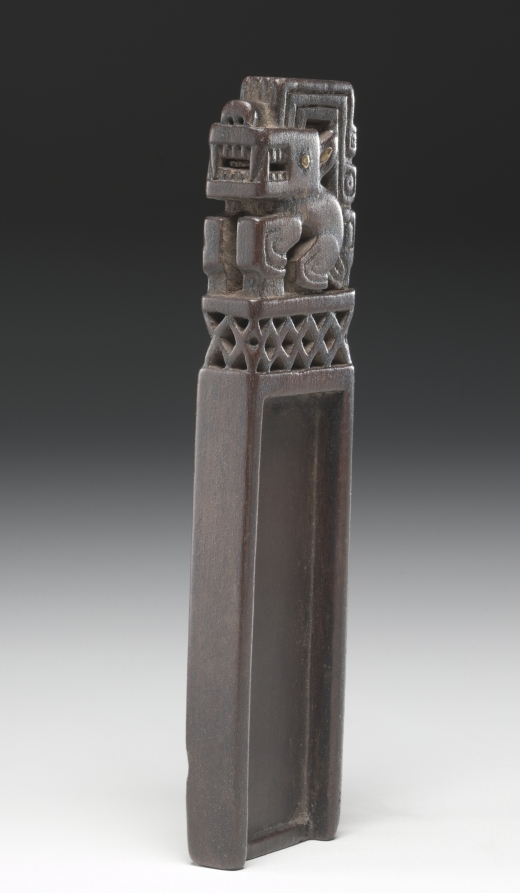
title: Snuff Tablet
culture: Peru, North Highlands, Recuay style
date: 1–650 CE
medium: wood with gold foil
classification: Furniture and woodwork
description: Both of these objects feature a creature known as the "Recuay feline," although it could also refer to a fox, dog, or viscacha (a rodent). Whatever its identity, the prominent crest on its head ties it to the supernatural realm, a connection underlined by the deity head that also appears on the dipper and by the ritual function of snuff tablets, which were used to inhale hallucinogenic snuffs during religious ceremonies.